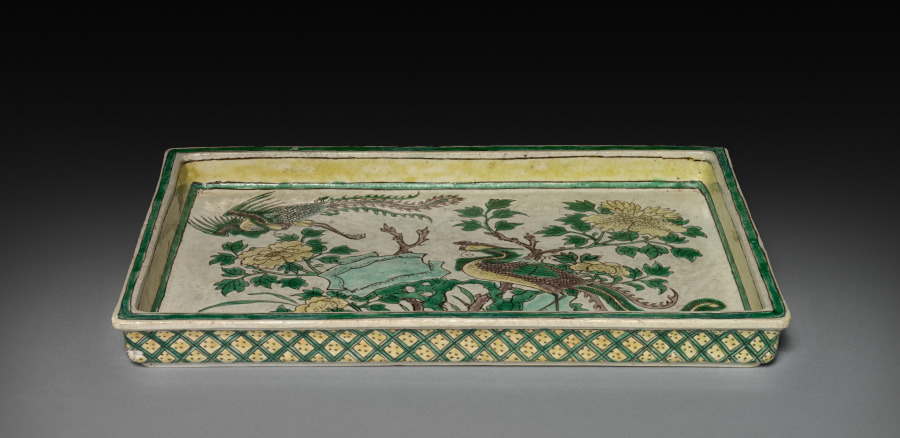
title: Tray with Phoenixes in Landscape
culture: China, Jiangxi province, Jingdezhen kilns, Qing dynasty (1644-1911), Kangxi reign (1662-1722)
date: 1662–1722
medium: porcelain with incised and sancai (3-color) enamel decoration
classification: Ceramic